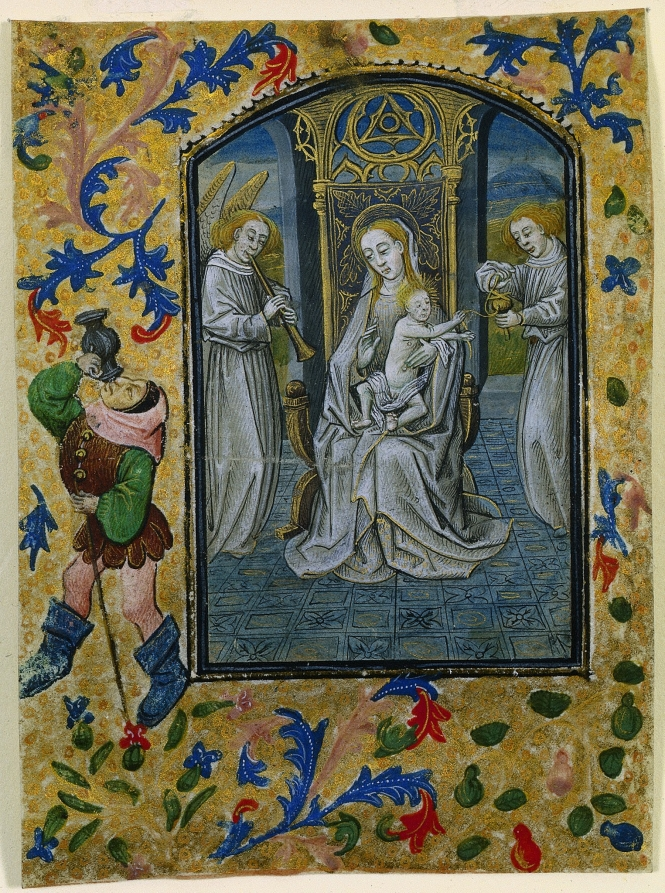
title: Leaf from a Book of Hours: Virgin and Child Enthroned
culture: Flanders, Bruges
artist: circle of Guillaume Vrelant (Flemish, c. 1454–1481)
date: c. 1470–1480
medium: tempera, liquid gold, and grisaille on vellum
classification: Manuscript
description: Guillaume Vrelant, born in Utrecht, was known to be in Bruges from 1454 onward where he died around 1481. He probably went there to sidestep a 1427 law which banned the sale of Utrecht images. A painter very much in vogue, he founded the Illuminators’ Guild in Bruges under the patronage of Saint John the Evangelist. He is known to have provided manuscripts to the Burgundian court.